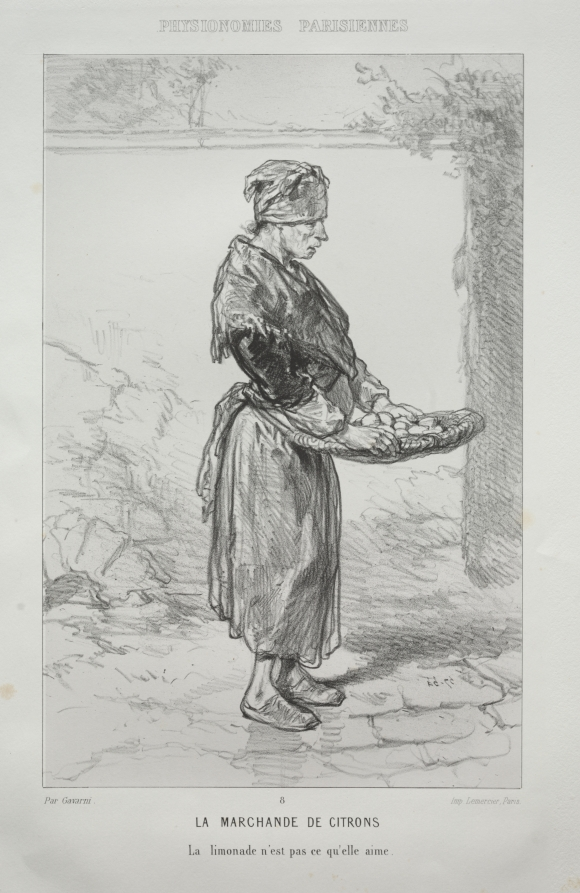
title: La Marchande de Citrons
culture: France, 19th century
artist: Paul Gavarni (French, 1804–1866)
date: c. 1857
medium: lithograph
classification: Print